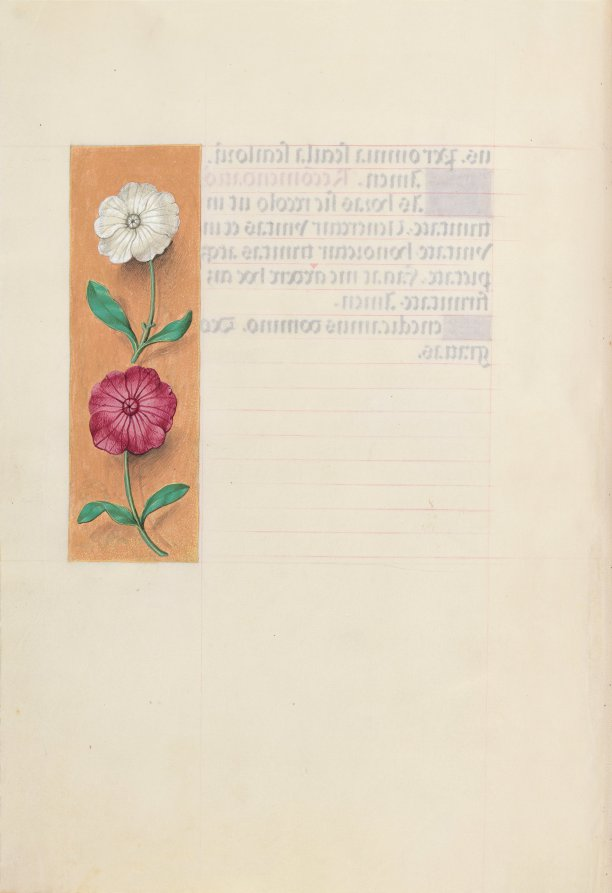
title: Hours of Queen Isabella the Catholic, Queen of Spain: Fol. 23v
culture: Flanders, Ghent and Bruges, late 15th century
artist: Master of the First Prayerbook of Maximillian (Flemish, c. 1444–1519)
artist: and Associates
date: c. 1500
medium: ink, tempera, and gold on vellum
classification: Bound Volume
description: This manuscript was illuminated by a circle of at least five highly organized manuscript painters active in the Flemish cities of Ghent and Bruges. The principal illuminator was Alexander Bening, who painted the majority of the book's miniatures. Manuscripts produced by this circle of artists are renowned for the decoration of their borders, which typically feature a rich variety of realistically-painted flowers, birds, and butterflies. This prayer book, called a book of hours, was intended not for a cleric, but for the private devotions of a lay person-in this case, Isabella the Catholic, Queen of Spain (1451-1504). Isabella's coat of arms embellishes the book's frontispiece. It is unlikely that the book was commissioned by the Queen herself; rather, she probably received it as a diplomatic gift from someone courting her patronage, perhaps Cardinal Francisco Jimenez de Cisneros. A Franciscan friar, Jimenez was dependent upon Isabella for his advancement, first to the post of Queen's confessor in 1492, and then to Archbishop of Toledo in 1495.